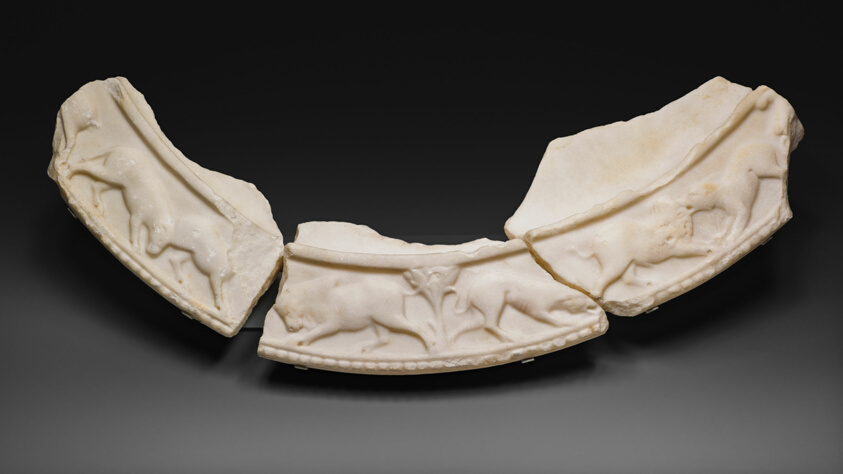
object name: Decorative Arts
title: Table Rim Fragments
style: byzantine, european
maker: Roman or Byzantine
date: 4th century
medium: Marble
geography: Istanbul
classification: marble; stone; sculpture; ancient art; decorative arts